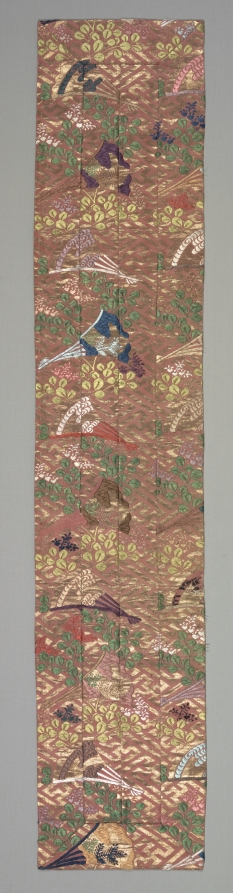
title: Sash (Obi)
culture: Japan, Edo period (1615-1868) or Meiji period (1868-1912), 19th century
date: 1800s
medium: silk, brocaded; metal thread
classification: Garment